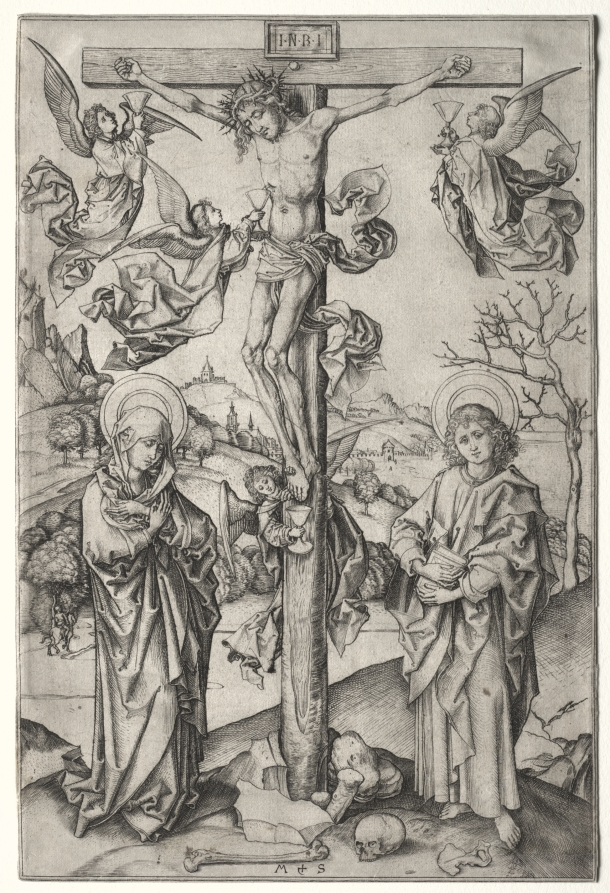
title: The Crucifixion with Four Angels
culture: Germany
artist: Martin Schongauer (German, c. 1450–1491)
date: c. 1475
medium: engraving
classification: Print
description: Martin Schongauer engraved several variations of the Crucifixion, often inspired by fifteenth-century Netherlandish paintings of the same subject. Here, upon a realistic landscape, the exaggeratedly thin and emaciated body of Christ hangs on the cross.The Virgin Mary and Saint John the Evangelist are mourning Christ's death at each side of the cross. Four hovering angels catch the blood from Christ's wounds and collect it in chalices. At the bottom of the cross, a bone and the skull of Adam, lie on the ground, and allude to Golgotha, the site of Christ's crucifixion, believed to be the spot where Adam died. The development of early printing methods during the fifteenth century offered more people personal devotional images that were previously limited to less affordable media, like paintings, sculptures, or illuminated manuscripts. Images of the Crucifixion functioned as devotional tools meant to help the faithful to meditate on Christ's suffering, sacrifice, and the redemption of humanity.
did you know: The collecting of Christ's blood in chalices by the angels in this composition refers directly to transubstantiation, or conversion of the Eucharistic elements into the body and blood of Christ during Roman Catholic mass.